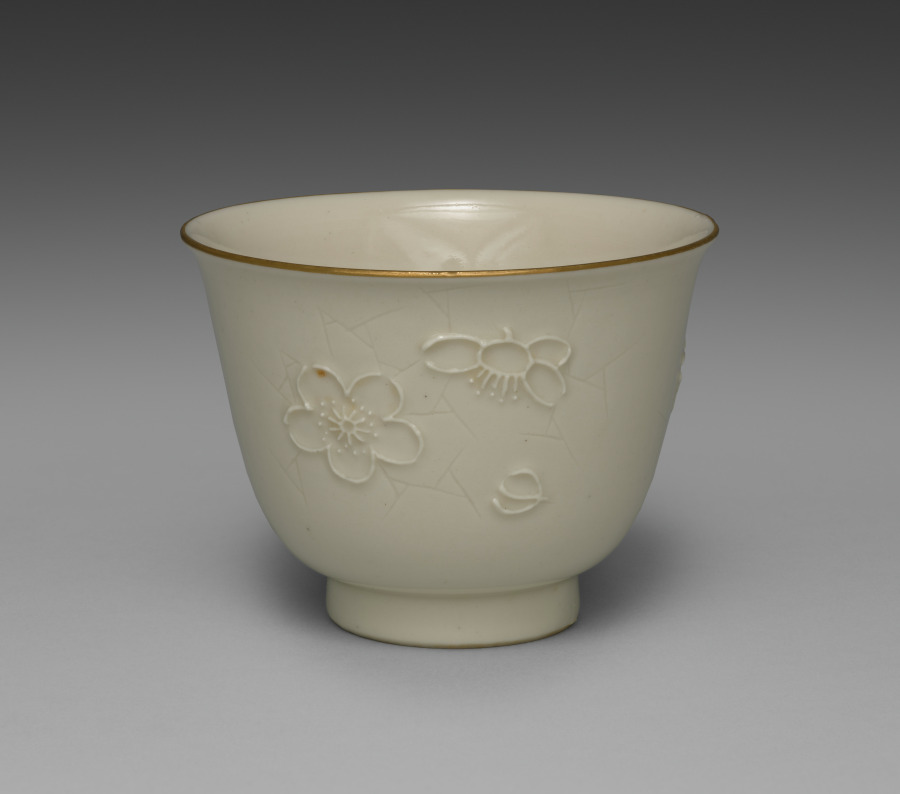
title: Drinking Cup from Dining Set with Plum Blossoms and Cracked-Ice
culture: Japan, Meiji period (1868–1912)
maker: Seifū Yohei II (Japanese, 1844–1878)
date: c. 1875–78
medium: Porcelain with molded designs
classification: Ceramic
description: Each item in this set has a delicate low-relief design of flowering plum branches over scattered, intersecting lines meant to resemble the cracked-ice surface of a frozen body of water and is signed on the base in gold pigment. While Yohei II produced many fine works in underglaze blue, like those produced by Kiyomizu Shichibei, he also made works in quite different styles later in his career, from the early 1870 s. In 1873, he was appointed purveyor to the Industrial Center of Kyoto Prefecture, a designation associated with Kyoto’s efforts to reach an international market through the port of Kobe; and from 1875 until his death, he was involved in national-level projects to present Japanese ceramics across the world. It was during this period that Yohei III was apprenticed to Yohei II, and it has been suggested that this set may in fact be an early example of Yohei III’s work, which he signed with his teacher’s name. Decorated with flowers resembling Japanese textile motifs, the set calls to mind the design of Yohei II’s pair of vases with plum blossoms in the Victoria and Albert Museum. Here, the elaborate trees created for a formal public exhibition setting have been translated into the approachable blossoms of the genteel domestic environment. While the designs are consistent across the pieces, each raised flower petal and pistil and each incised line in the ice was done by hand, so the cups, bowls, and dishes are similar yet unique. The bottoms of two boxes once identified the set’s owner, but the information has been deliberately obscured with black ink. However, inscriptions still visible appear to indicate two occasions, once at the end of July 1886 , and once again in June 1916 , when parts of the set were requested from Hokura in Niigata Prefecture. The location corresponds to a neighborhood in the present-day city of Jōetsu. The surname Tsuji 辻 also appears on a paper tag affixed to one of the box cloths. Future research may possibly reveal more about their provenance. A vase by Yohei III in a private collection combines the formal grandeur of the Yohei II vases in the Victoria and Albert Museum with the gentler design of this dining set, placing flowering plum trees against soft, scalloped-edge clouds resembling those in golden screens.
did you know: The dining wares have a creamy white coloration that the four boxes containing them identify as Korean in style.